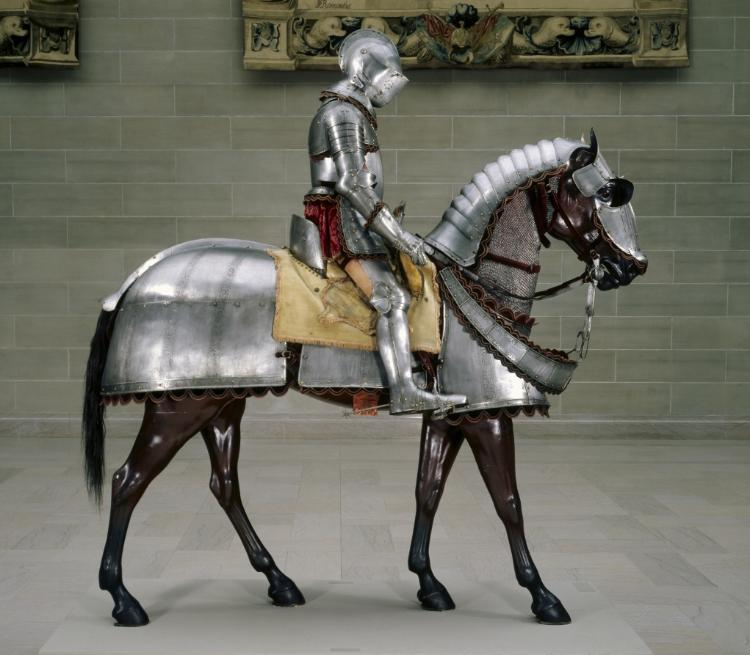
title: Armor for Man and Horse with Völs-Colonna Arms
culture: North Italy, 16th century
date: c. 1575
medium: steel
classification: Arms and Armor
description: A knight depended on his horse both as a weapon and a means of defense. He therefore had to take great care to protect his charger. From the 1100s on, knights first covered their steeds in trappings of fabric and later of mail. By around 1400, full steel plate armor for horses was complete. It is possible that this armor made for both man and horse originally belonged to a "garniture," an armor with multiple customized exchange elements that could convert the basic suit to various field and sporting uses. With different pieces of the garniture attached, this suit could have been worn either in battle or in various tournament games. The total combined weight of both the man's and horse's armor is 114 pounds. The etched decoration of this armor is of a type that became fashionable in northern Italy during the late 1500s. It consists of ornamental bands of etched figures, animals, portrait busts, and armor trophies. In addition, a coat of arms is represented seven times in different places—the center of the breastplate and blackplate, the front and back of each pauldron (shoulder defense), and the center of the peytral (horse's breastplate). The coat of arms is that of the Colonna family quartered with another, still unidentified family. It probably belonged to an unknown member of the Völs-Colonna family from the South Tyrol, now part of northern Italy.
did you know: The Vols-Colonna family crest is found seven times in prominent locations on this armor set for horse and rider.